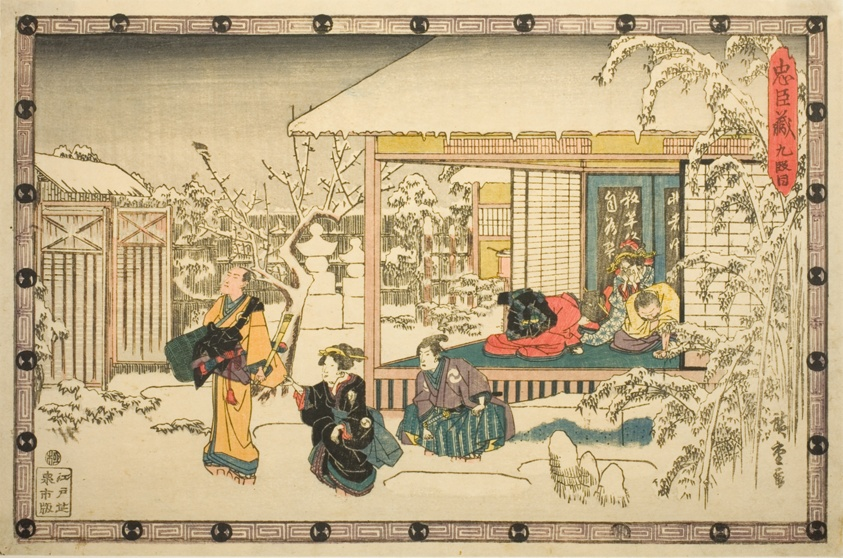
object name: Print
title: Act 9 (Kyudanme), from the series "The Revenge of the Loyal Retainers (Chushingura)"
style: Japanese (culture or style)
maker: Utagawa Hiroshige 歌川 広重; Japanese, 1797-1858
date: c. 1834/39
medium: Color woodblock print; oban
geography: Japan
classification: woodblock print; print; asian art